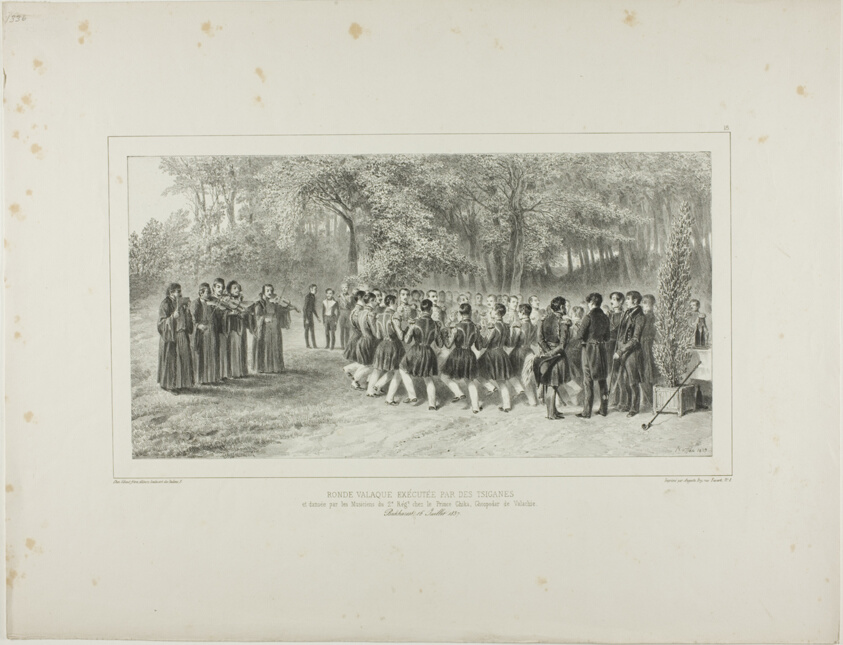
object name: Print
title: Wallachian Round, Performed by the Tsiganes and Danced by the Second Regiment Musicians at the Home of Prince Ghika, Ghospodar, Wallachia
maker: Denis Auguste Marie Raffet (French, 1804-1860); printed by Auguste Bry (French, 19th century); published by Chez Gihaut Frères (French, 19th century)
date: 1839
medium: Lithograph in black on ivory chine laid down on ivory wove paper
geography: France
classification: lithograph; print; prints and drawing